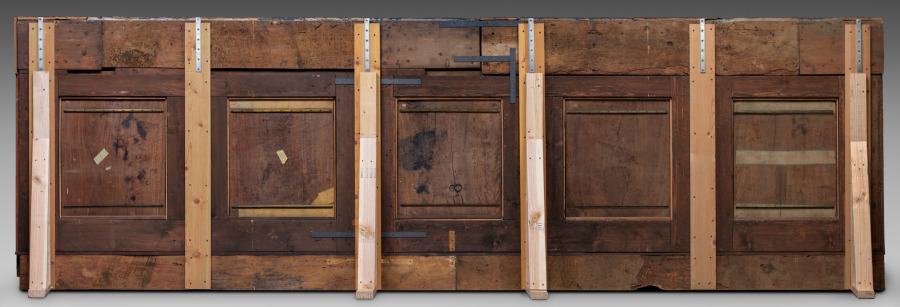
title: Upper Paneling from a Sacristy Armoire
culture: Italy, Florence, late 15th century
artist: attributed to Giuliano da Maiano (Italian, 1432–1490)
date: c. 1460–1475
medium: walnut, inlaid with holly and ebony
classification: Furniture and woodwork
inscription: in four of the five panels is the Medici badge of a jeweled ring wound with a ribbon or bannerole, on which is inscribed the motto "Semper." The frieze in the cornice contains part of a quotation from the Vulgate, Paul's epistle to the Romans, Chapter XI.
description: The imagery on the inset panels is the result of a technique known as intarsia, the skilled inlaying of woods of different colors to create a type of mosaic, popular during the 15th and 16th centuries in Italy for the decoration of paneling and furniture for studies, small rooms, and church sacristies. This large set of five intarsia panels comes from an unknown Florentine church. In its original setting the panels rested upon a row of similarly decorated cupboards (a sacristy armoire) which were used for the storage of liturgical vestments and books. This panel would have therefore been seen at eye level. The central panel depicts the Resurrection of Christ. The two outside panels depict the emblem of Lorenzo de Medici-three plumes encircled by a jeweled ring above a scrolling ribbon containing the Latin word SEMPER (Always). Lorenzo de Medici (1449-92) was the ruler of Florence when this sacristy armoire was constructed and was the likely patron. It seems to be the work of Giuliano da Maiano, an architect and intarsia-maker also responsible for the intarsia in the sacristy of Florence Cathedral.